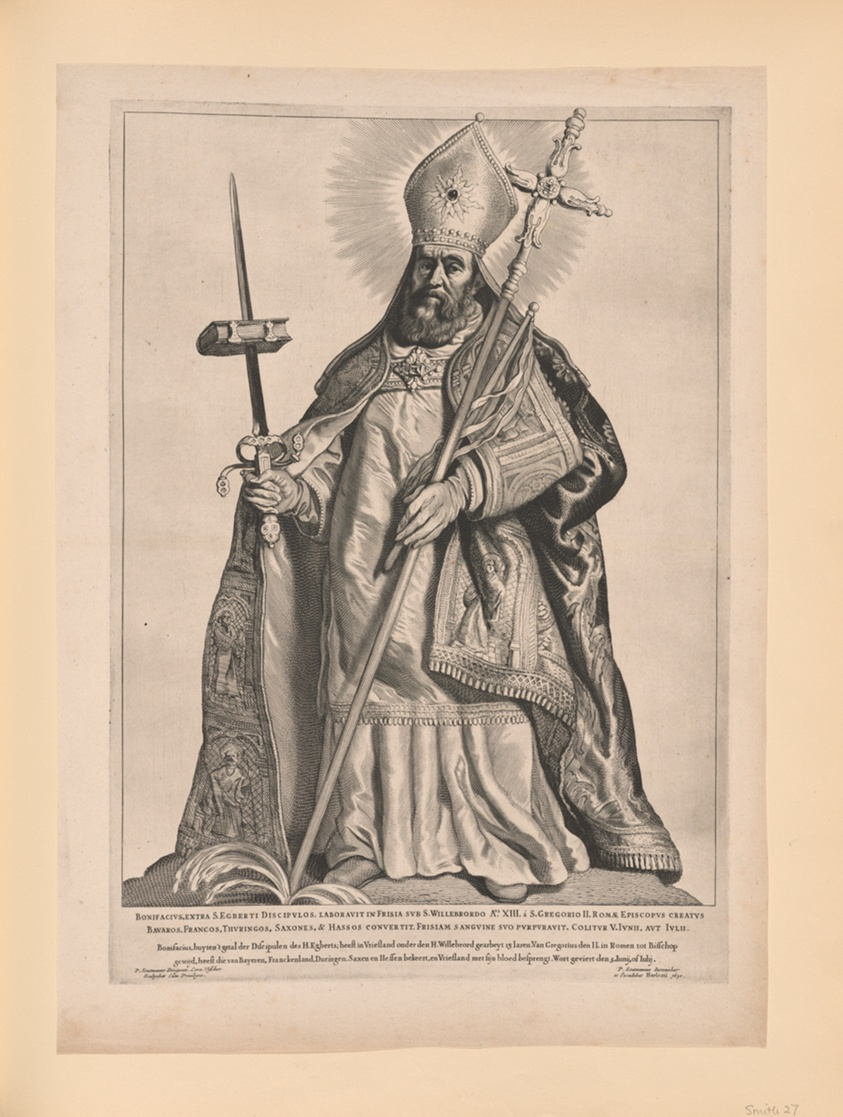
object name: Print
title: Saint Boniface, from Saints of the North and South Netherlands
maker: Cornelis Visscher (Dutch, c. 1629-1658); after Pieter Claesz. Soutman (Dutch, c. 1580–1657)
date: 1650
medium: Etching and engraving on paper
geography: Netherlands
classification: engraving; paper; print; prints and drawing